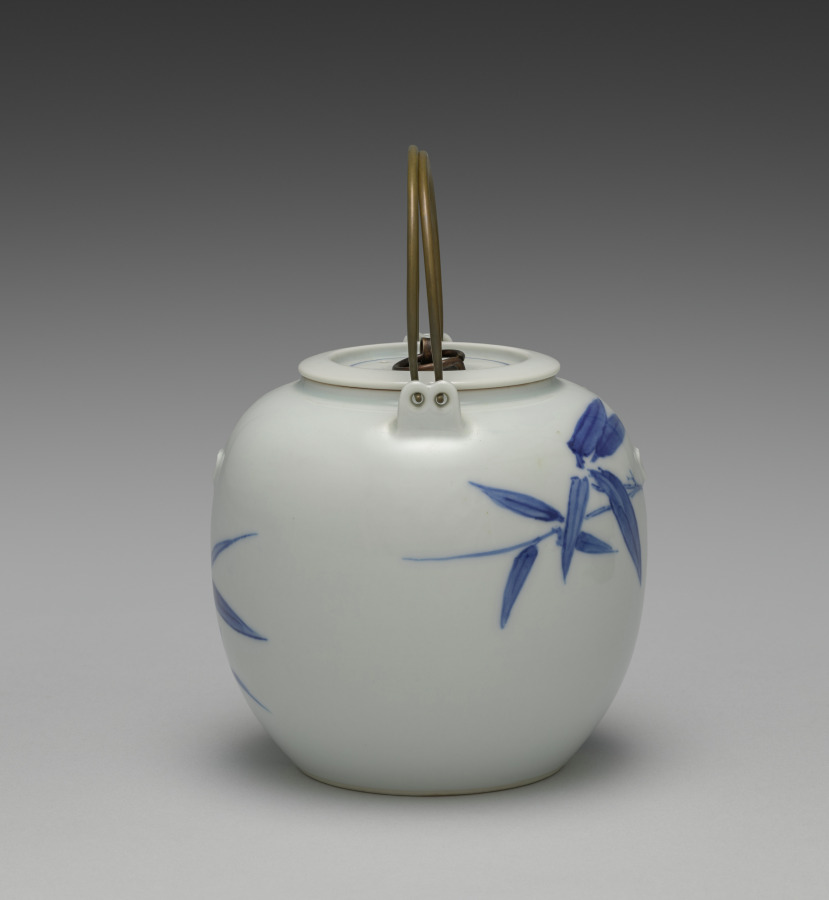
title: Teapot with Bamboo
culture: Japan, Taishō period (1912–26) or Shōwa period (1926–89)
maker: Seifū Yohei IV (Japanese, 1872–1951)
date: 1914–46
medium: Porcelain with underglaze blue, molded design and metal handles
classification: Ceramic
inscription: 清風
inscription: 清風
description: This teapot has a well-balanced design of bamboo in underglaze blue and nyoi staff-head motifs applied to both sides at the shoulder.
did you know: There is a seal on the base of the teapot.